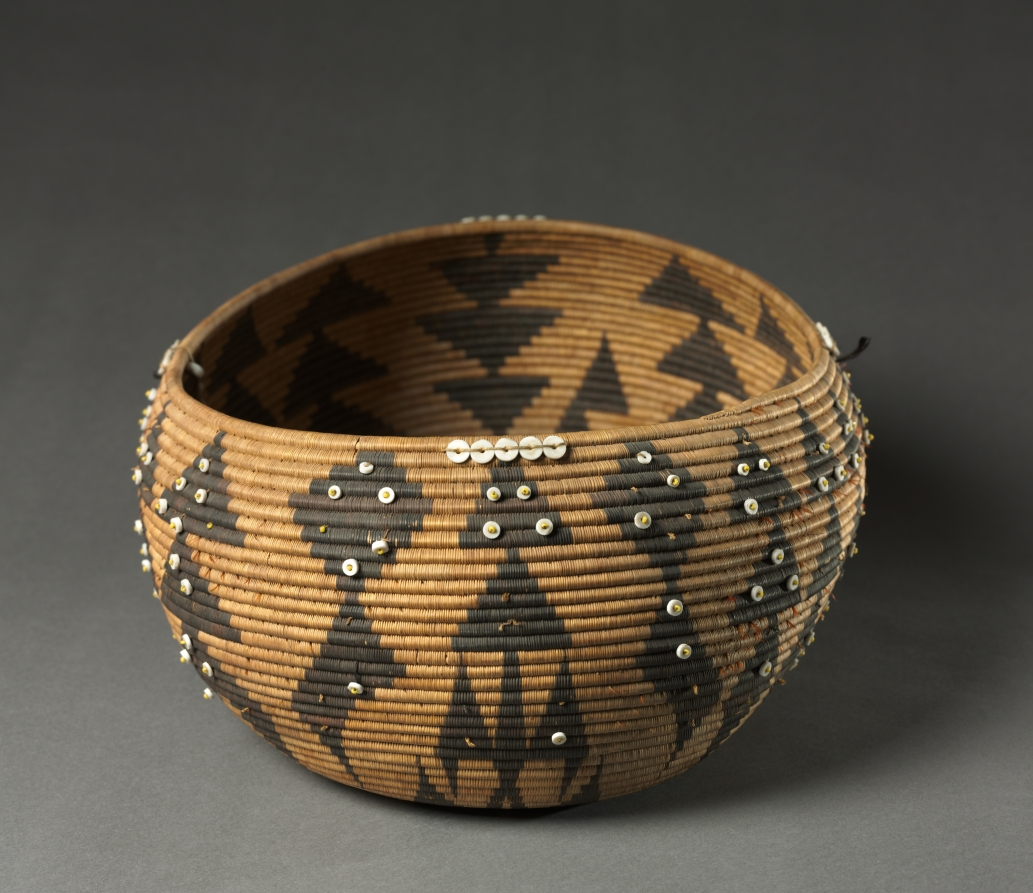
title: Doctor's Basket, Canoe- shaped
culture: California, Pomo, 19th century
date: 1890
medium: coiled, with shell and yellow glass beads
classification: Basketry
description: Oblong baskets like this one, which range in size from miniatures to examples more than four feet long, are sometimes said to have been used by native doctors to store medicines and paraphernalia such as rattles. This one, however, probably was made not for native use but for sale to a turn-of-the-century collector.